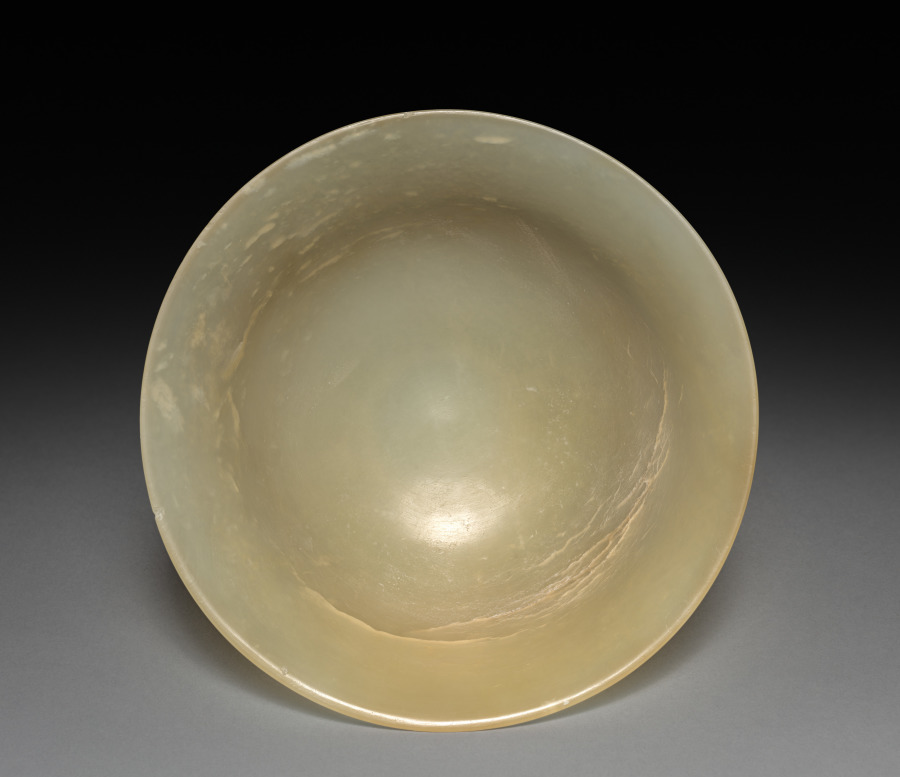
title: Stem Cup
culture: China, Ming dynasty (1368–1644)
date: 1368–1644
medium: white jade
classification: Jade